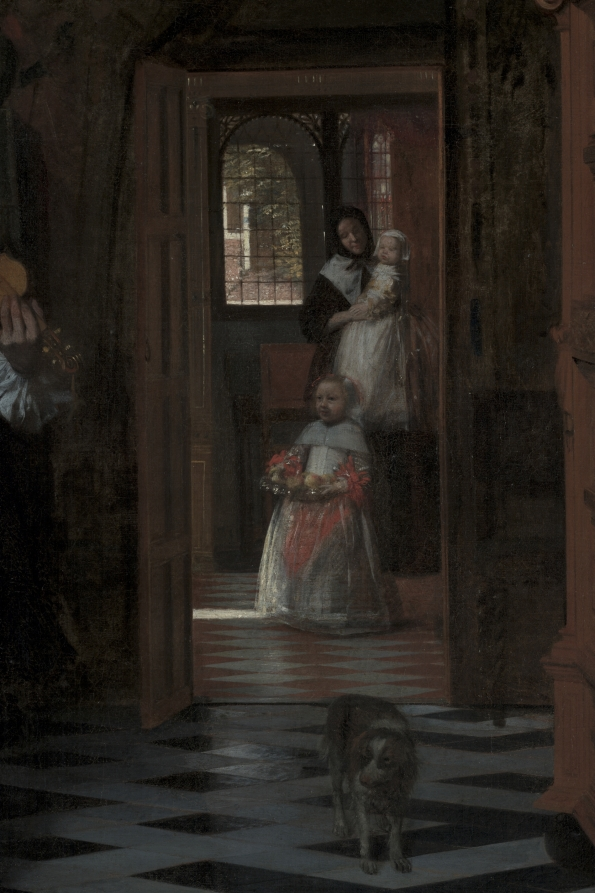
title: Portrait of a Family Playing Music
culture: Netherlands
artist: Pieter de Hooch (Dutch, 1629–1684)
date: 1663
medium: oil on canvas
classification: Painting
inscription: Signed lower left: "P D HOOCH/ 63"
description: The identity of the sitters remains unknown, although the marble floor and mantelpiece, the Transylvanian prayer rug on the table, and the silk clothes all point to the family’s considerable wealth. Furthermore, the richly carved chest at the right supports Chinese vases and Japanese lacquered boxes, a reference to the flourishing Dutch trade with Asia. Music making often took place at home, and its appearance here also signifies the harmoniousness of the family.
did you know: During this period, the Dutch Republic was the richest, most urbanized nation.